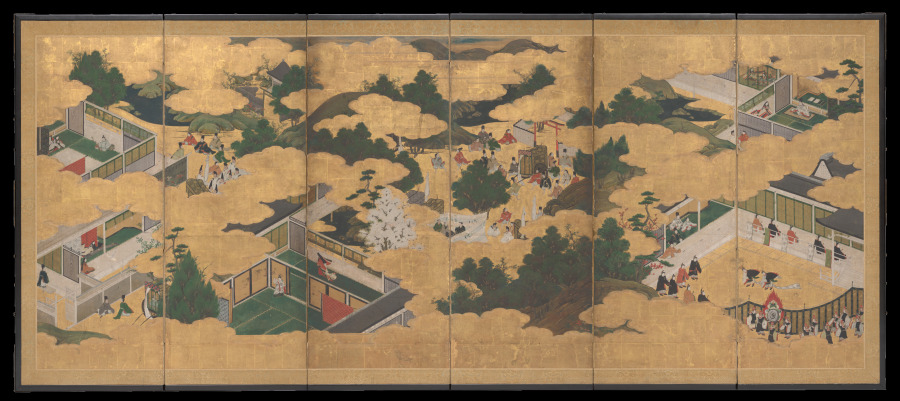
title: Scenes from the Tale of Genji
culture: Japan, Edo period (1615–1868)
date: 1700s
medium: Six-panel folding screen; ink, color, gold and gilding on paper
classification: Painting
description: Folding screens served as temporary dividers in traditional Japanese open-plan architectural spaces. This screen was inspired by Japan’s most celebrated work of literature, the Tale of Genji, written by Murasaki Shikibu, an attendant to the empress in the early 11th-century imperial court. The novel follows the love life of the “Shining Prince” Genji and delves into the psychological states of his many companions.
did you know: Distinct episodes are nestled within a matrix of golden clouds and landscape elements.